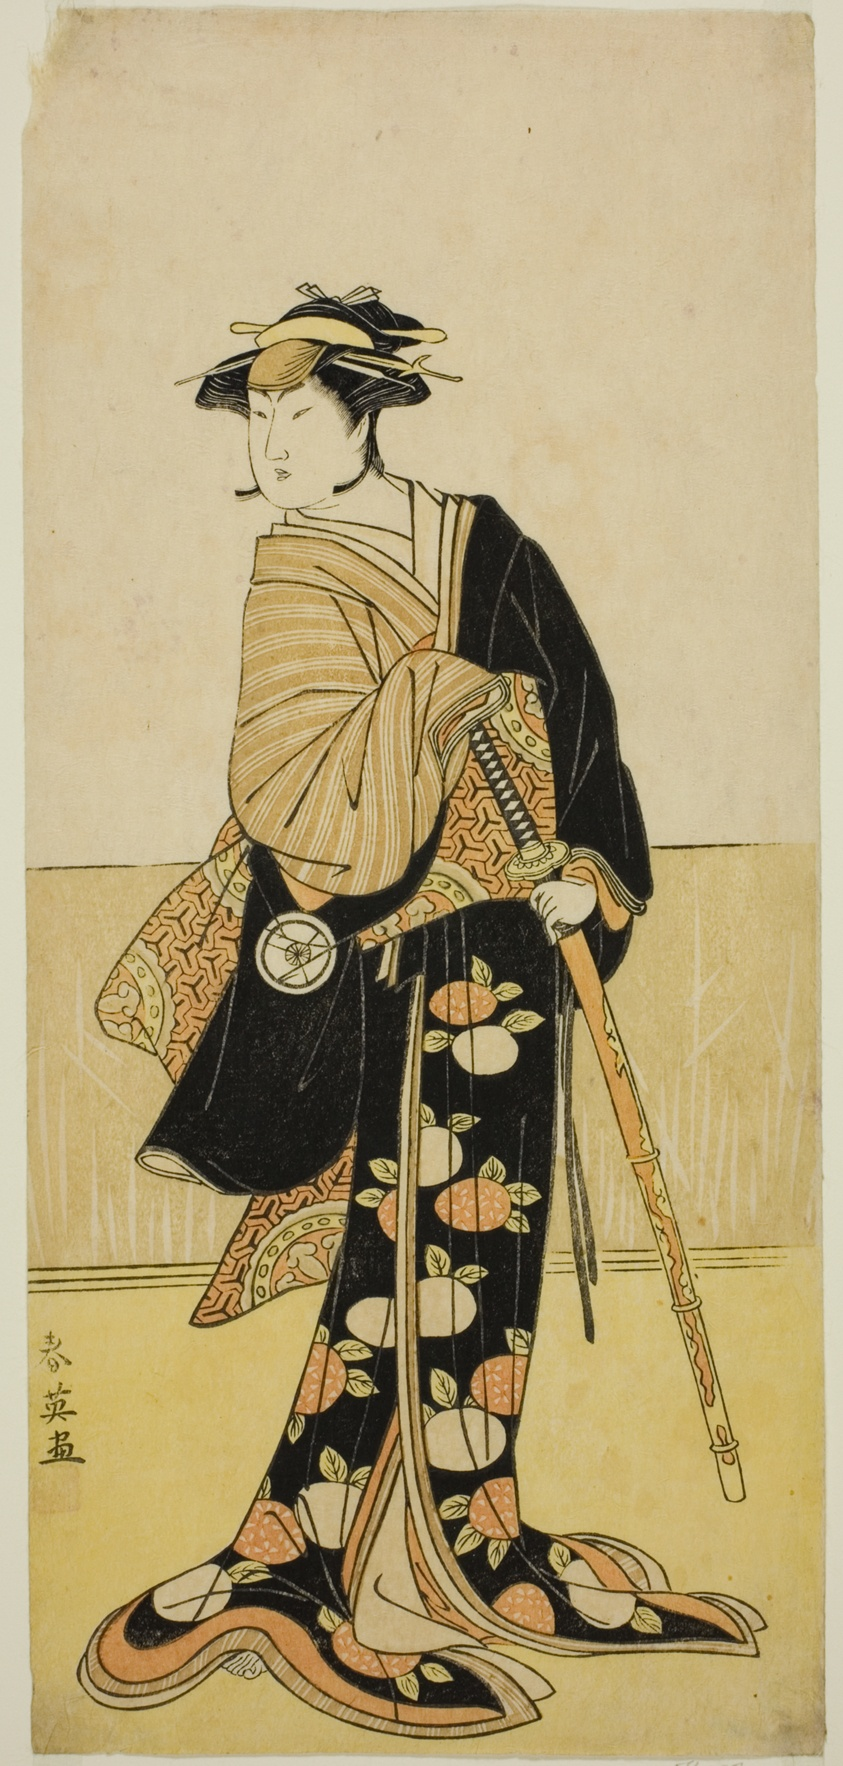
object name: Print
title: The Actor Iwai Hanshiro IV as Tonase (?) in the Play Kanadehon Chushingura (?), Performed at the Kiri Theater (?) in the Eighth Month, 1787 (?)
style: Japanese (culture or style)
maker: Katsukawa Shun'ei (Japanese, 1762-1819)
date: c. 1787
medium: Color woodblock print; hosoban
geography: Japan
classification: woodblock print; print; asian art